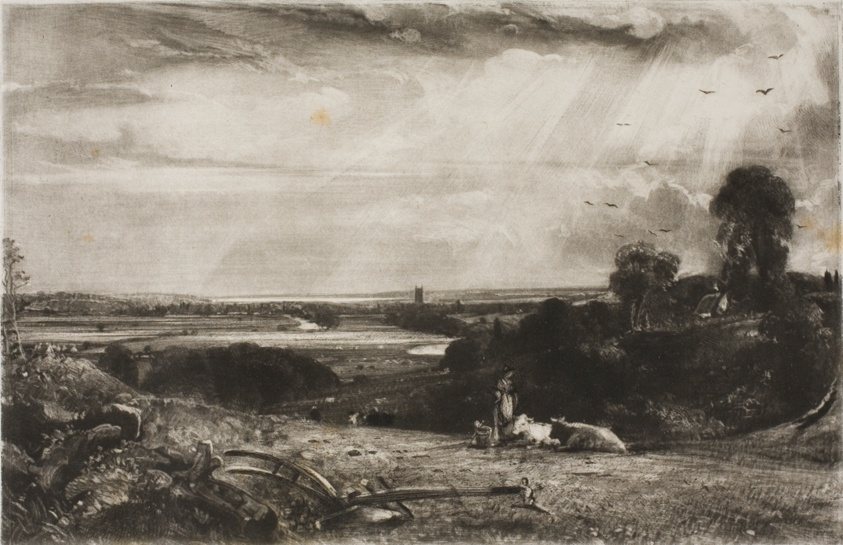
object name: Print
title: Summer Morning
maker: David Lucas (English, 1802-1881); after John Constable (English, 1776-1837)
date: 1831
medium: Mezzotint on paper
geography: England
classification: mezzotint; print; prints and drawing